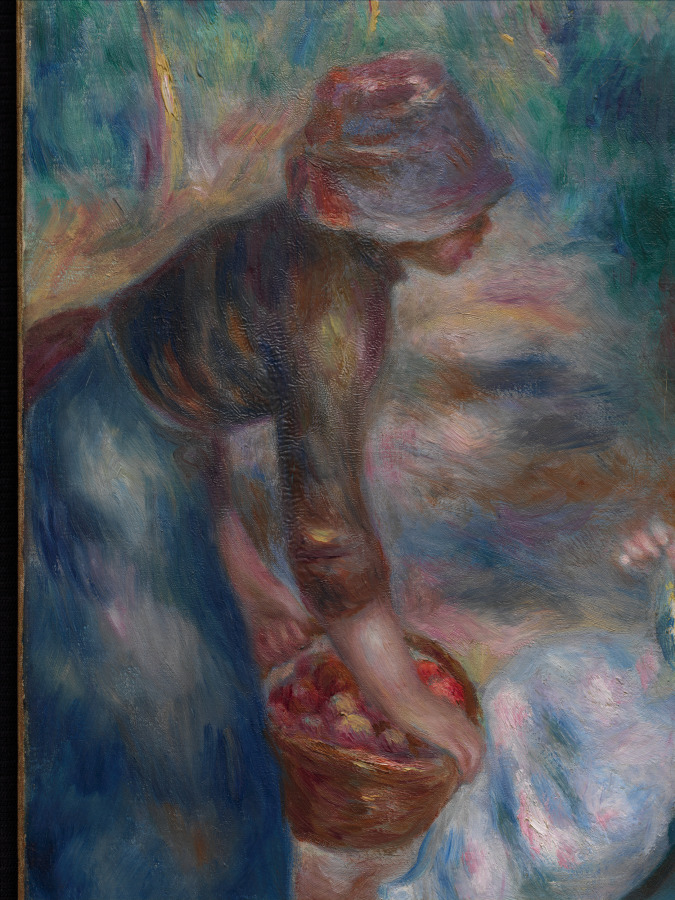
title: The Apple Seller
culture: France, 19th century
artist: Pierre-Auguste Renoir (French, 1841–1919)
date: c. 1890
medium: oil on fabric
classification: Painting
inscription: Signed center right: a. renoir / 1864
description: This painting depicts a young country girl offering apples to Renoir's wife, Aline. The boy in the straw hat may be the artist's nephew, Edmond, but the young girl with the ribbon in her hair has not been identified. Bathed in soft, dappled sunlight, the figures are united through the fluid brushstrokes that cover the canvas. The leaping dog provides an accent of humor and motion in an otherwise tranquil scene. The picture was probably completed at Essoyes, in eastern France.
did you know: Using repetitive, soft, light-of-touch brushstrokes to form patches of color, Renoir creates a sense of dappled light that reflects on the ground and caresses the figures, giving the painting an ethereal, dreamlike quality.